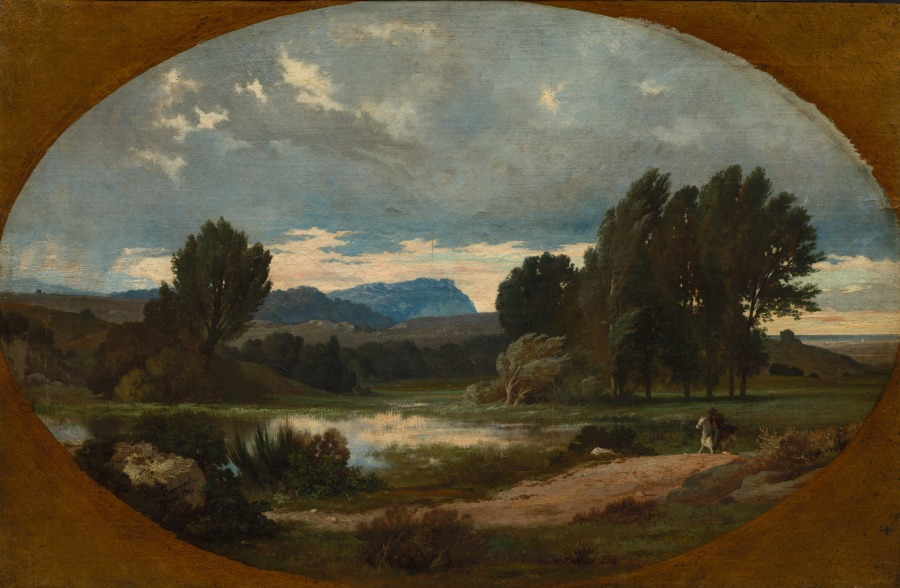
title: Landscape with Rider on White Horse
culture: France, 19th century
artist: Jean Achille Benouville (French, 1815–1891)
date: 1846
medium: oil on canvas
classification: Painting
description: The darkly shaded trees and turbulent sky introduce a romantic sentiment into this classical or ideal landscape in which a lone rider on horseback gallops through a deep space. The composition is organized into three clearly defined zones that recede from the path in the foreground, to the lake or river in the middle ground, to the distant rocky mountain and sea.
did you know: In 1863, Benouville was named a Knight in the Legion of Honor, the highest French order of merit.